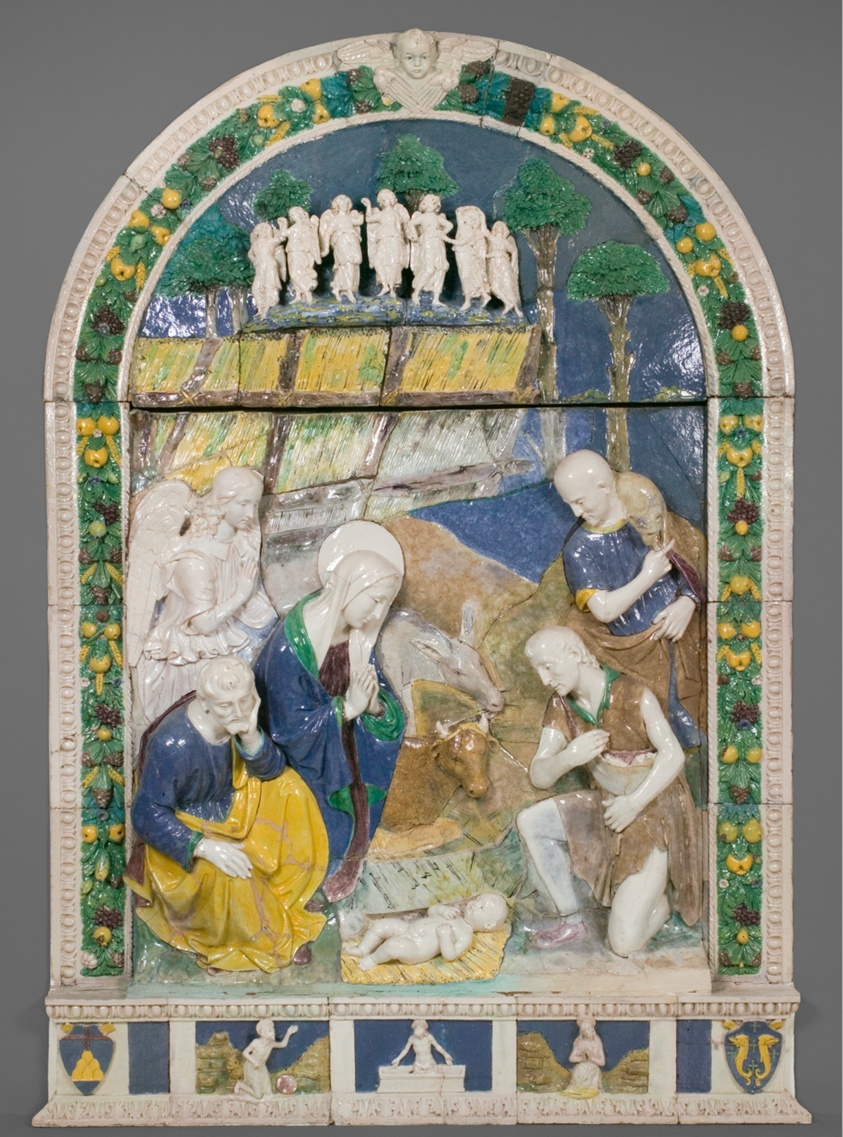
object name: Sculpture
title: Adoration of the Shepherds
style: sixteenth century, 16th Century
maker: Benedetto Buglioni (Italian, 1459/60–1520); Workshop of Benedetto Buglioni (Italian, 1459/60–1520)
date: c. 1520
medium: Glazed terracotta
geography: Italy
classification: large scale; terracotta (sculpture); Italian; sculpture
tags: holy family, women, woman, Virgin Mary, Virgin and child/Madonna and child, religious scenes, religious figures, religious, religion, men, Jesus, family, families, donkeys, cows, Christianity, Christian subjects, children, biblical, babies, animals, angels, blue, blue (color), yellow (color), green (color), grapes, coat of arms, wheat, foliage, Narrative, Devotion